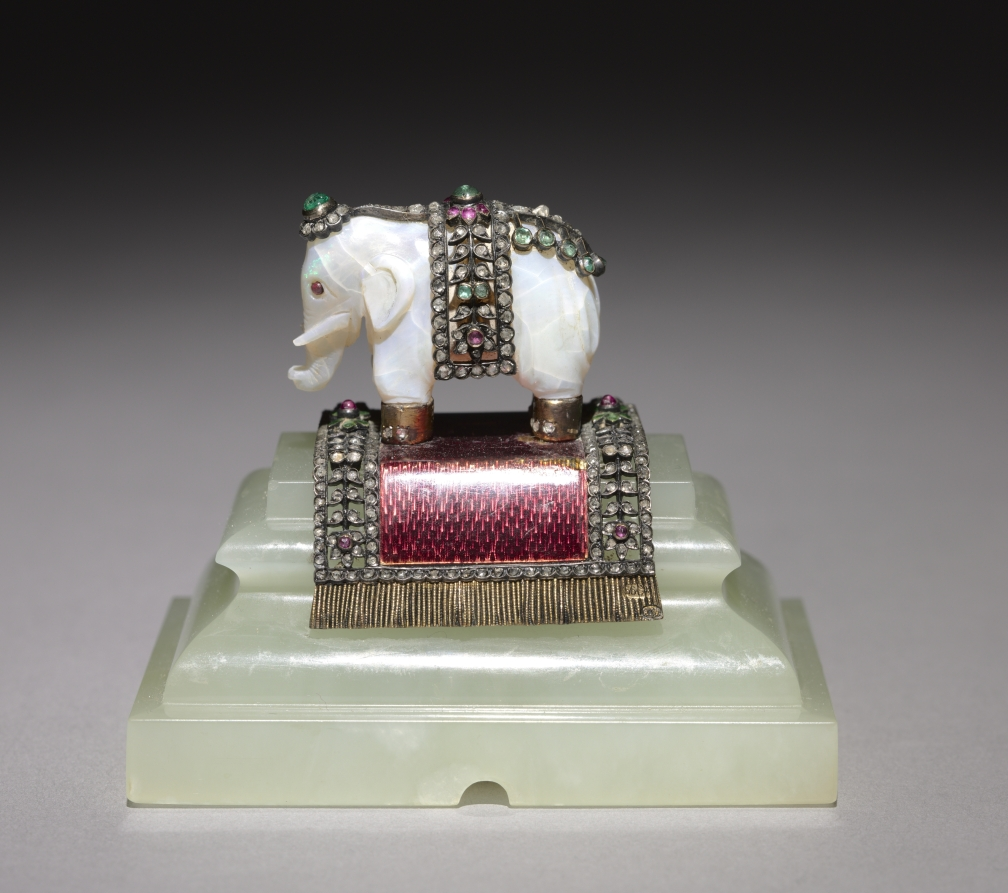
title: Elephant Bell Push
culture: Russia, St. Petersburg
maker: House of Fabergé (Russian, 1842–1918)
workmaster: Henrik Wigström (Russian, 1862–1923)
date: after 1903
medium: jade, gold, rubies, emeralds, diamonds, enamel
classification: Miscellaneous